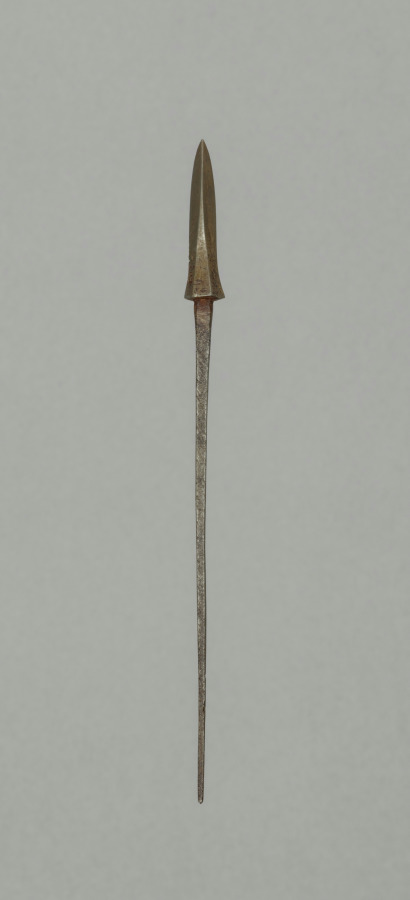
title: Arrow Point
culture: Japan, Edo period (1615–1868)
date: 1700s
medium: steel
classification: Arms and Armor